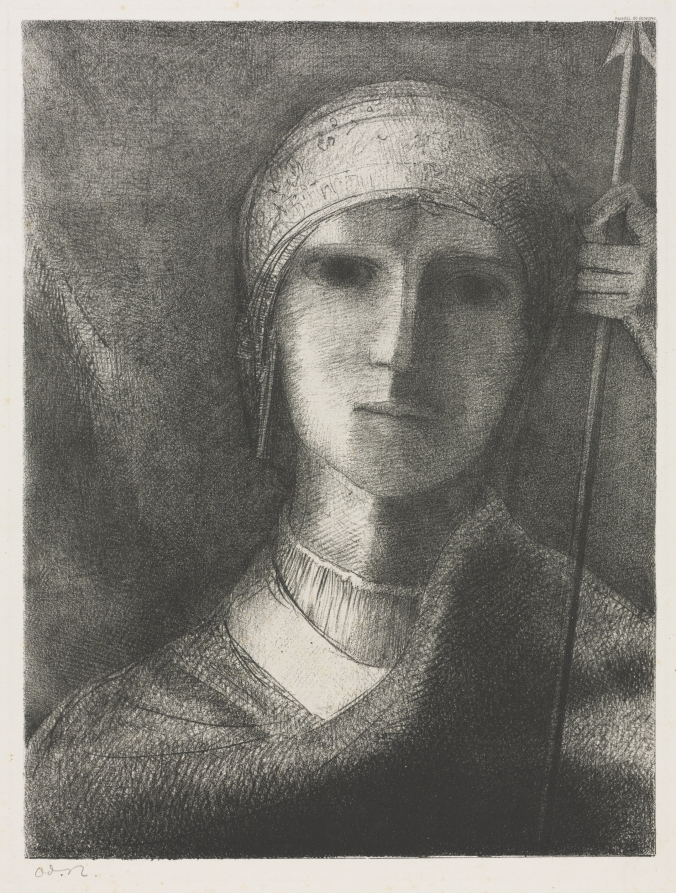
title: Parsifal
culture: France, 19th-20th century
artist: Odilon Redon (French, 1840–1916)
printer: Becquet (French)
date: 1892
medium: lithograph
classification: Print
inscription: signed on stone, lower left: ODILON REDON; inscribed lower left below image, in graphite: Od. R.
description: Like many artists of the time, Odilon Redon drew inspiration from 19th-century German composer Richard Wagner and explored his music throughout various media. Here, Redon depicted Parsifal, the heroic knight after whom Wagner titled an 1882 opera centered on a search for the Holy Grail. The print’s murky tones combine with Parsifal’s vacant stare to create an aura of mystery. The print was the first given to the museum by Ralph King, a founding trustee and a Redon enthusiast known among New York City gallerists in the 1920s for his tendency to purchase their entire inventories of the artist’s work.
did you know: When Redon was working on this lithograph, he discovered a flaw in the stone and started over. He reused rather than discarding the original stone for The Druidess, another print.